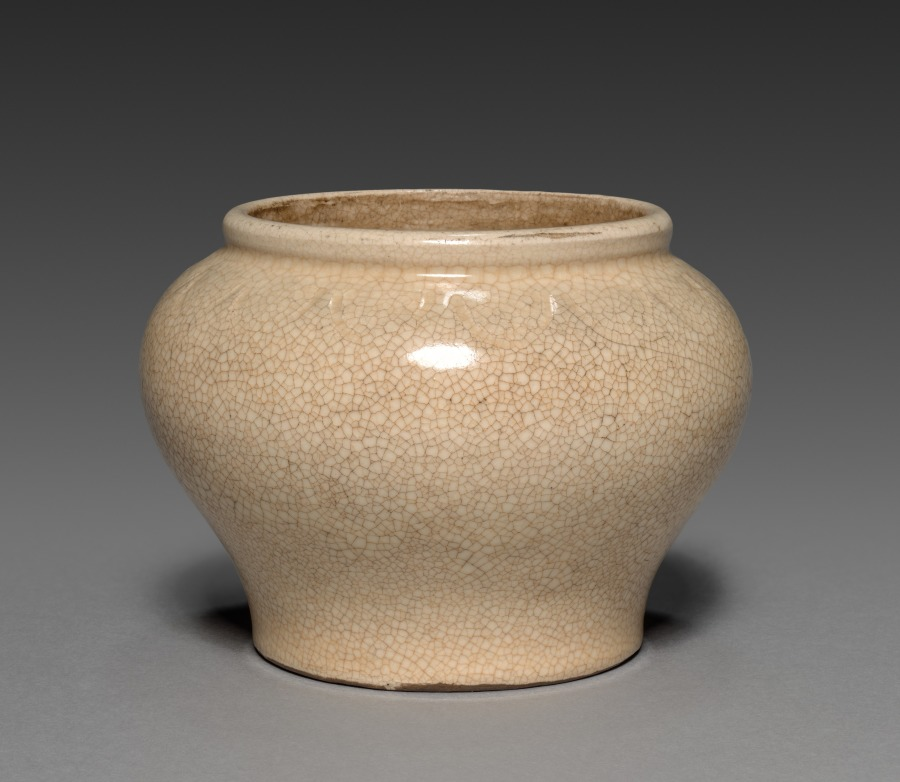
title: Jar (Satsuma ware)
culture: Japan, Meiji period (1868–1912)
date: 1868–1912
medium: pottery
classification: Ceramic